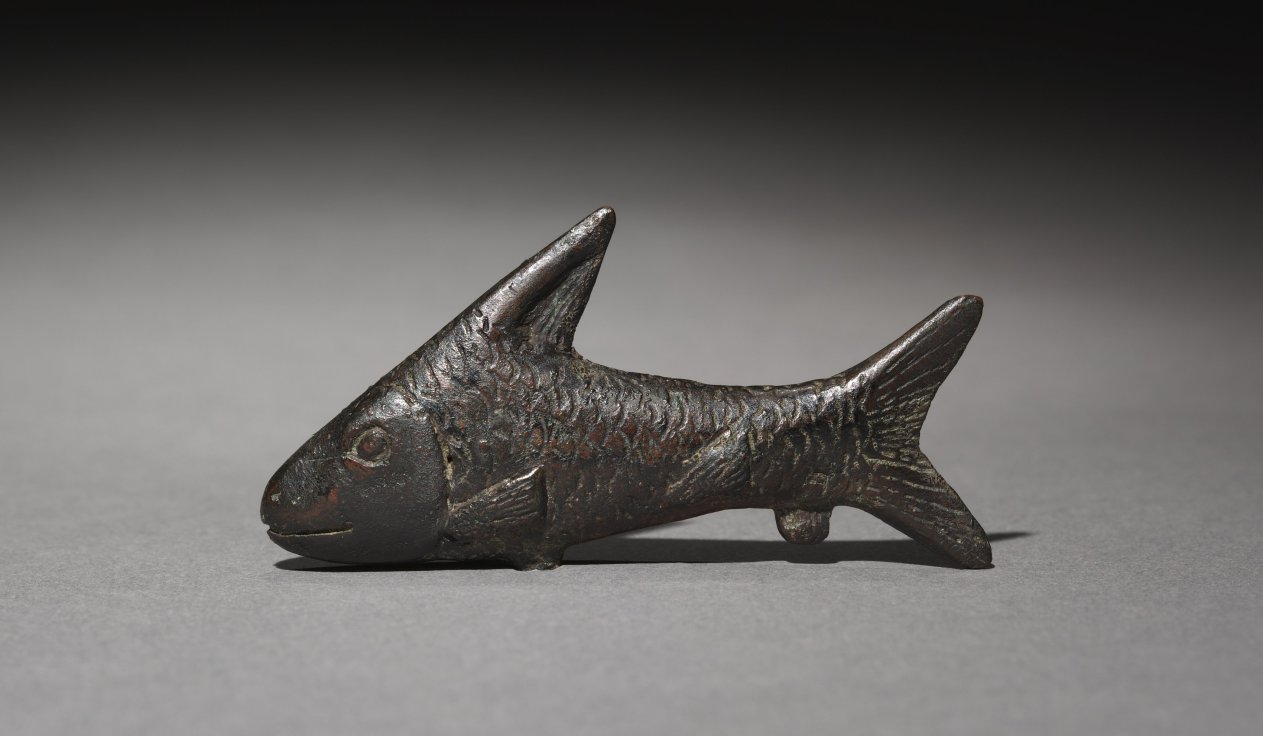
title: Small Lepidotus Fish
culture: Egypt, Greco-Roman period (332 BCE–395 CE), Ptolemaic dynasty (305–30 BCE)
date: 305–30 BCE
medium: bronze, hollow cast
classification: Sculpture